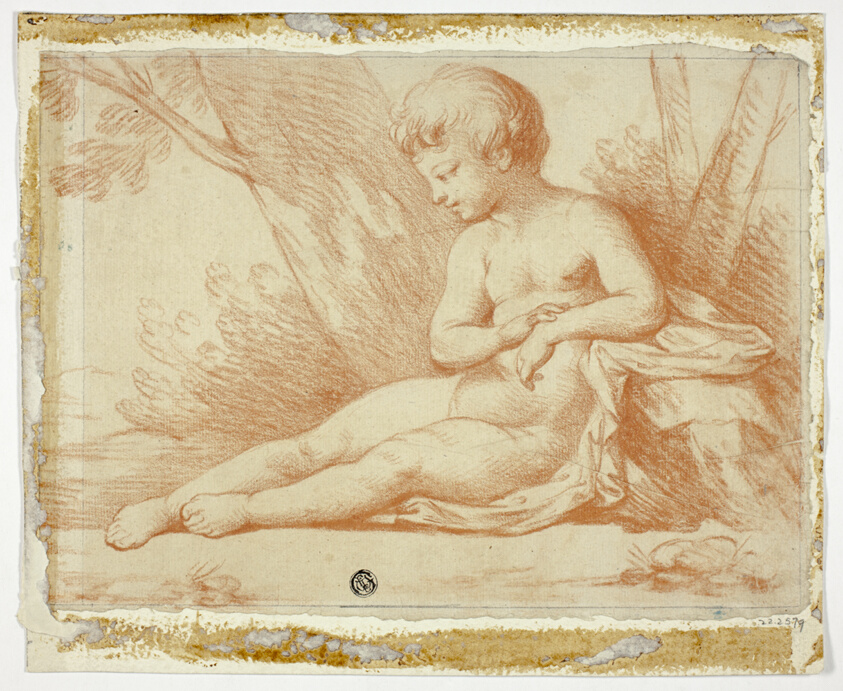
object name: Drawing and Watercolor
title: Nude Child Seated Under Trees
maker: Style of Edme Bouchardon (French, 1698-1762)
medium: Red chalk, on ivory laid paper, laid down on ivory wove card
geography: France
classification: chalk; drawings (visual works); prints and drawing